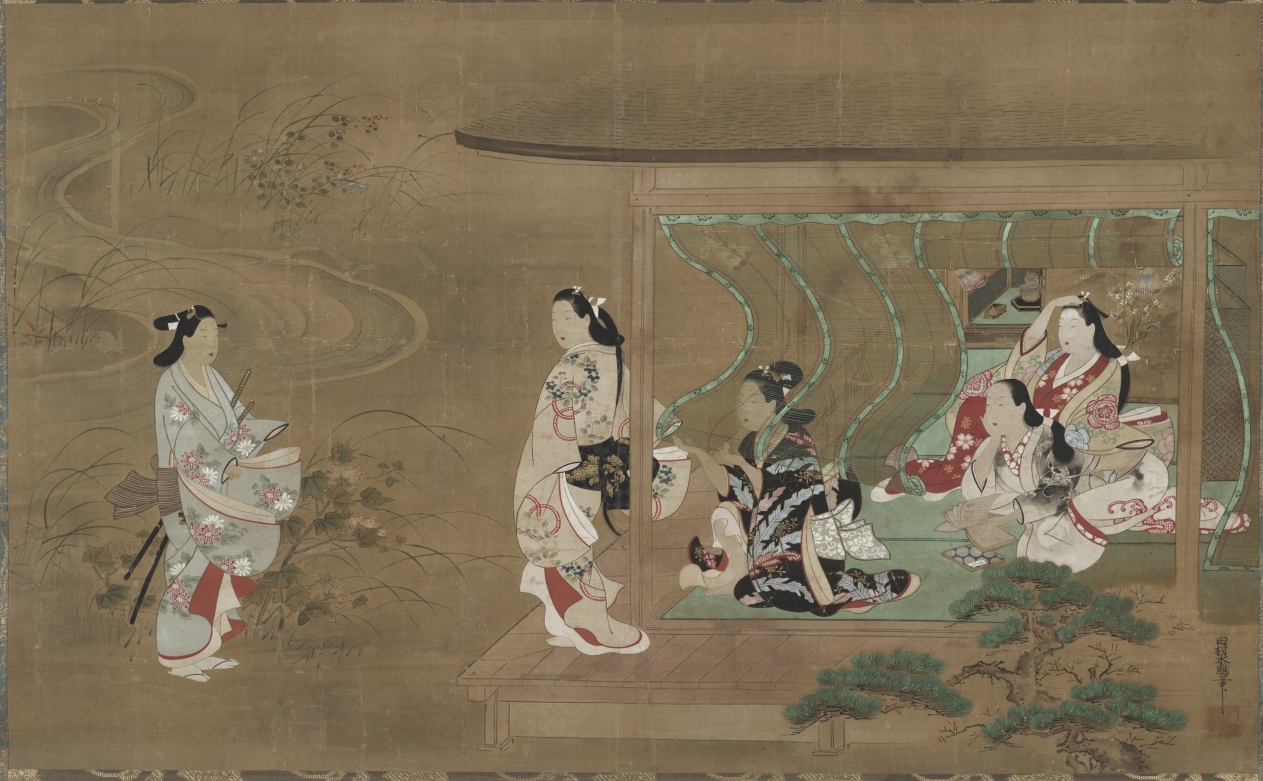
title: Beauty Receiving a Visitor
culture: Japan, Edo period (1615–1868)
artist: Tamura Suio (Japanese, active late 1600s–early 1700s)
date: late 1600s–early 1700s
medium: Hanging scroll; ink and color on silk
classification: Painting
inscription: artist's signature and seal, lower right corner.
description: Here, a person steps out to the engawa, a wood-floored corridor that runs along the outer edge of a house, to greet a visitor as the individual’s companions look on. A strong breeze blows the sleeves of their robes and the translucent blinds enclosing their sitting room. The group’s wealth and high status is signified by the two swords the visitor carries and everyone’s intricately patterned garments. A raised blind lets the viewer peek in to see a black lacquer box decorated with designs in gold powder and a ceramic incense burner on a hexagonal lacquer tray positioned carefully in the room’s display alcove, or toko.